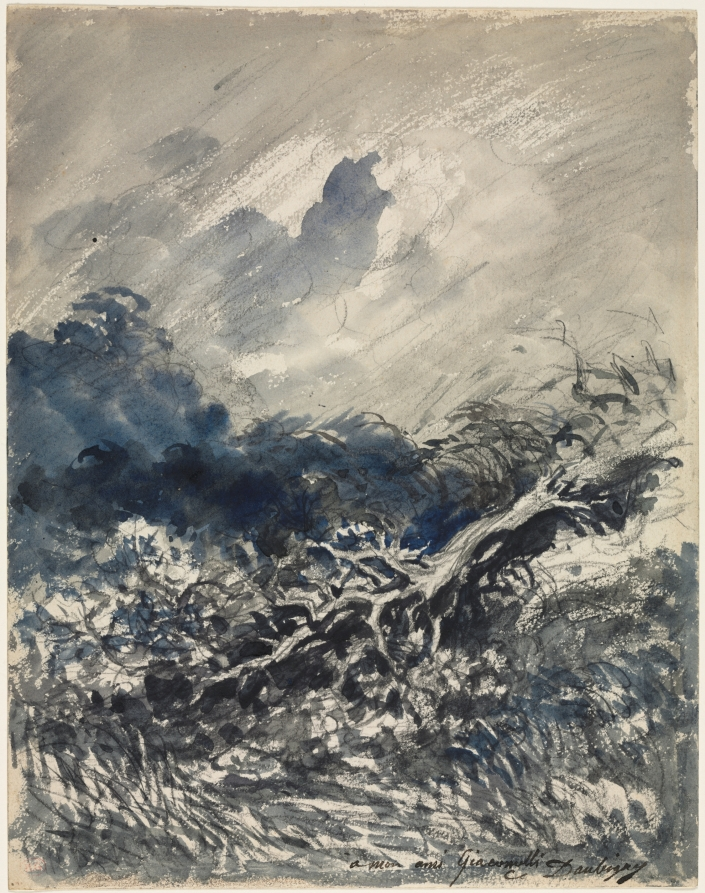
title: The Oak Tree and the Reed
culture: France, 19th century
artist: Charles François Daubigny (French, 1817–1878)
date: c. 1873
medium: blue, gray, and black wash, and graphite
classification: Drawing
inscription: signed, lower right, in brown ink: à mon ami Giacomelli / C Daubigny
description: The Oak Tree and the Reed illustrates the fable of the same name by the 17th-century French writer Jean de La Fontaine (1621-1695). Having disdainfully pitied the reed for bending before the wind, the oak is shown torn from the earth by a terrific north wind. Focusing upon the uprooted oak, Daubigny created a violently expressive treatment of the subject. The bold dappling of lights and darks below is set off by the intense blue of the clouds encroaching upon the land from the left. The diagonal streaks of thin-ly applied gray wash above suggest driving rain.